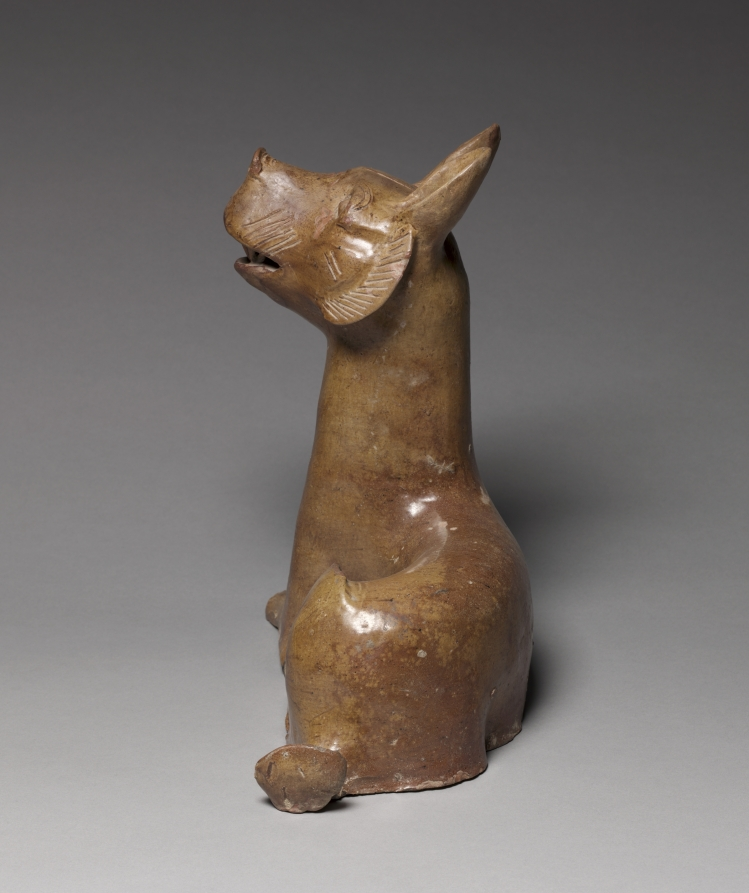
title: Dog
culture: China, Eastern Han dynasty (25–220 CE)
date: 25–220 CE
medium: earthenware with lead glaze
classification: Sculpture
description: Modeled with a lively naturalism and light humor, this dog reflects the worldly tastes of Han China. It differs from the solemn animal images on ritual bronze vessels, which served as the medium for communication with the supernatural realms. The Han people held beliefs in a worldly paradise and an otherworldly realm of eternal life and happiness.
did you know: The dog's muzzle, whiskers, and neck scruff were boldly incised into the earthenware form.